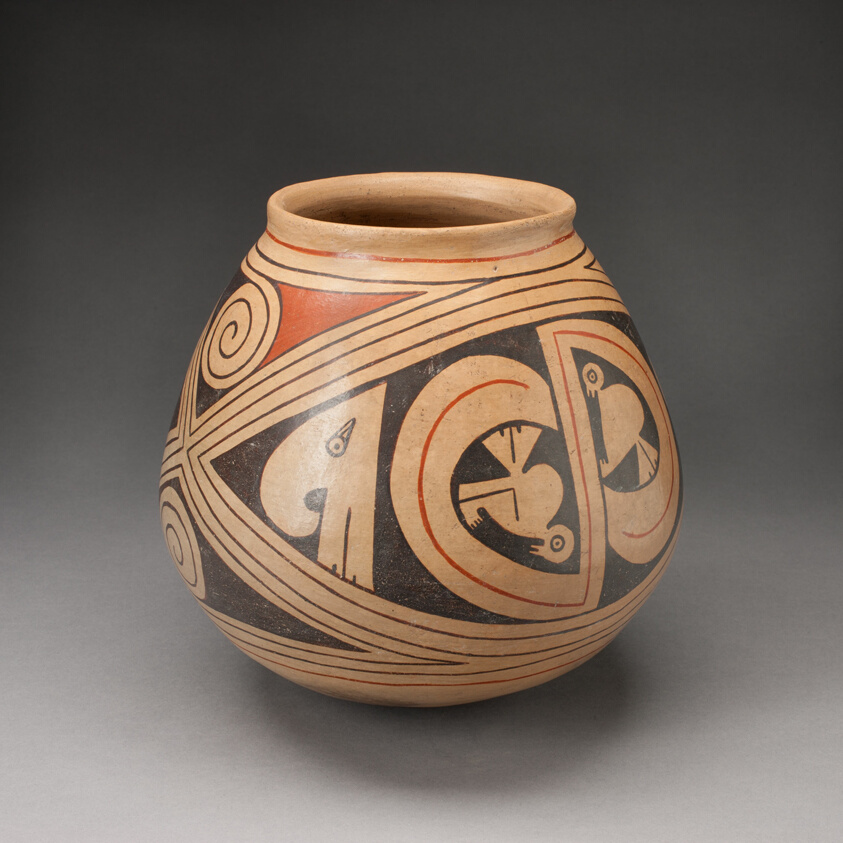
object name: Vessel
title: Jar with Diamond-Shaped Frames with Abstract Birds and Coiling Motifs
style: casas grandes, Pre-Columbian, southwest, indigenous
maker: Casas Grandes, Ramos Polychrome; New Mexico, United States, or Chihuahua, Mexico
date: 1280–1450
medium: Ceramic and pigment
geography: New Mexico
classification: vessel; earthenware; ceramics